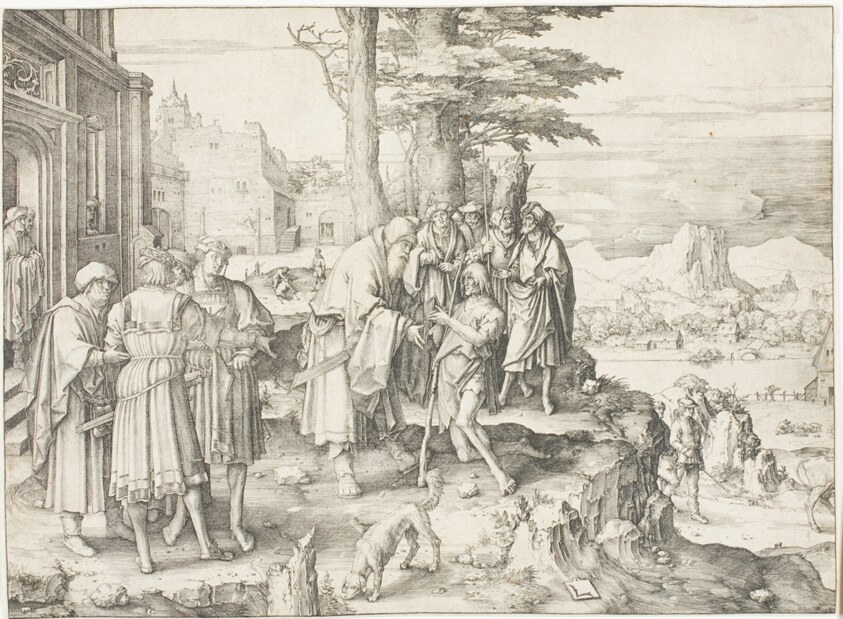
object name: Print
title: The Return of the Prodigal Son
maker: Lucas van Leyden (Netherlandish, c. 1494-1533)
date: c. 1510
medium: Engraving in black on cream laid paper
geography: Netherlands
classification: engraving; print; prints and drawing